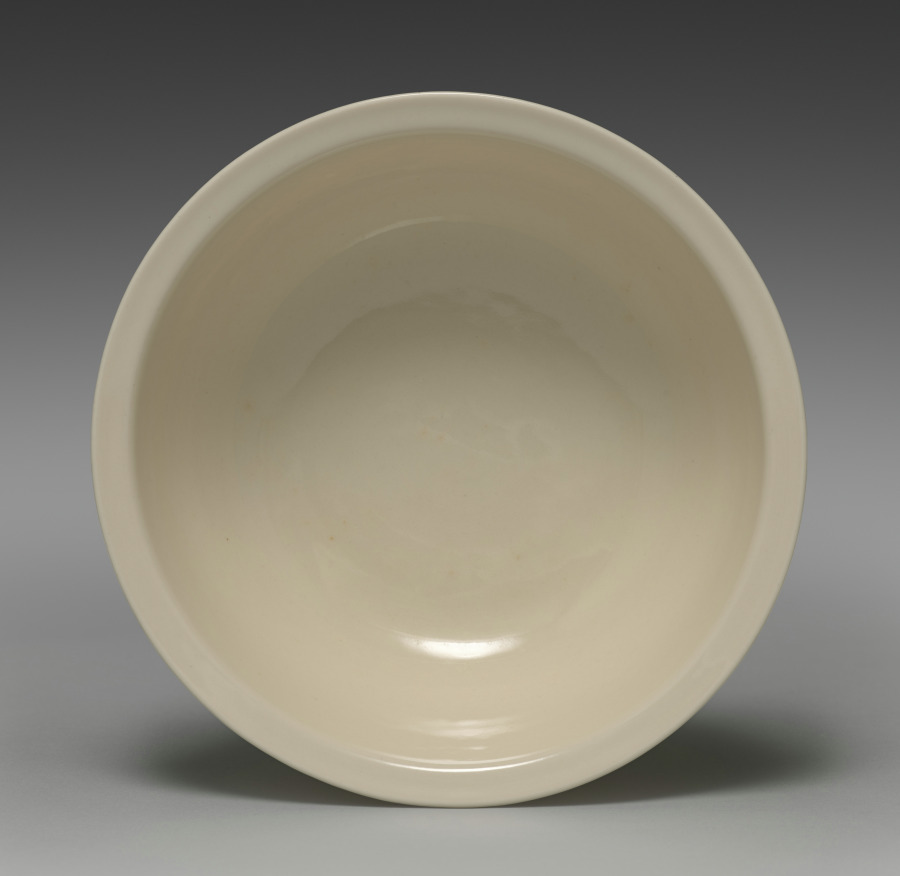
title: Bowl with Old Pine and Poem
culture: Japan, Taishō period (1912–26) or Shōwa period (1926–89)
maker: Seifū Yohei IV (Japanese, 1872–1951)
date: 1914–46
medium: Porcelain with molded and carved design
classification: Ceramic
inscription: 鶴樹君子風拂太平枝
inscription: 清風造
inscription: 清風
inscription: 成山清風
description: A grand, aged pine is carved into the body of this bowl. The inscription on the reverse side explains the tree’s presence. It is an altered version of two lines from a poem by Li Jiao (646?–715?) called “Pine.” Li Jiao was a senior government official who had a tumultuous career under the reign of Wu Zetian (r. 690–705), as well as those of her sons and grandson during the Tang dynasty (618–907). Although little known today, his work was read in Japan during the Heian (794–1185) and Kamakura periods (1185–1333). An anthology containing his poems, which was lost in China, was passed down across the generations in Japan. The translation of the inscription is as follows (the original characters, written and read from right to left, are shown below from left to right): The crane nests in the mastwood tree, the wind flicks at its peaceful branches. 鶴樹君子風拂太平枝 The mastwood is a pine-like evergreen, and the crane sheltering there is protected from the wind. In the original poem, the characters before “branches” (枝) are rather 大夫, meaning “high official.” This is likely a reference to the title bestowed upon a pine tree by the emperor Qin Shi Huang (r. 221–210 BCE) in thanks for its protection when a fierce rain fell as he ascended Mount Tai to pay his obeisance to the heavens.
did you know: The box inscription identifies the bowl's glaze as kanpakuyū, "bright-jewel white glaze."